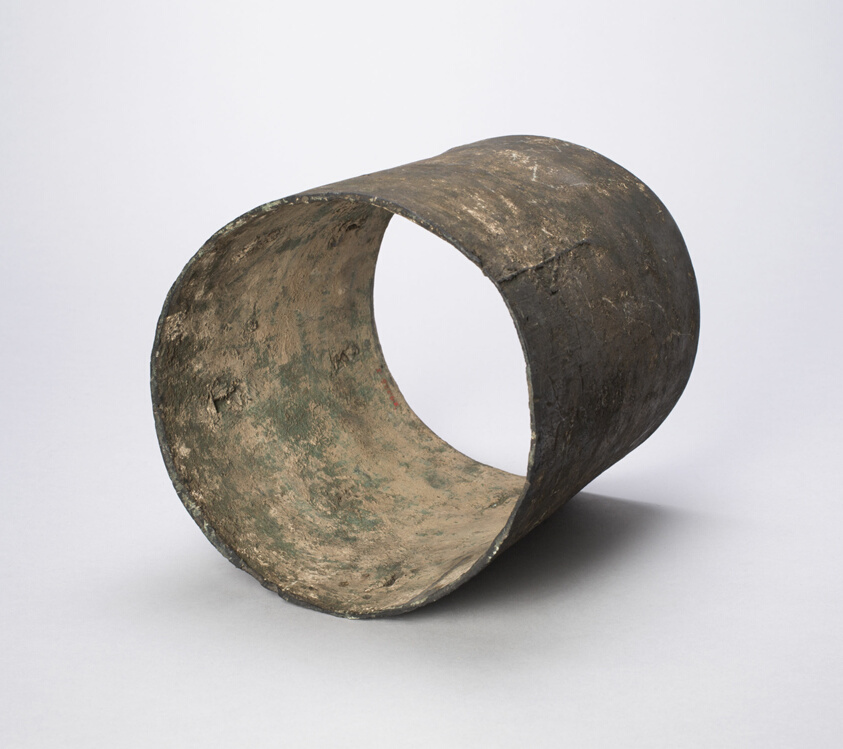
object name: Architectural fragment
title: Architectural Fitting (Gong)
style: Chinese (culture or style)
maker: China, Qishan county, Shaanxi province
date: Eastern Zhou dynasty, Spring and Autumn period (770–481 B.C.), 7th century B.C.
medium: Bronze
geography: China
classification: architectural fragment